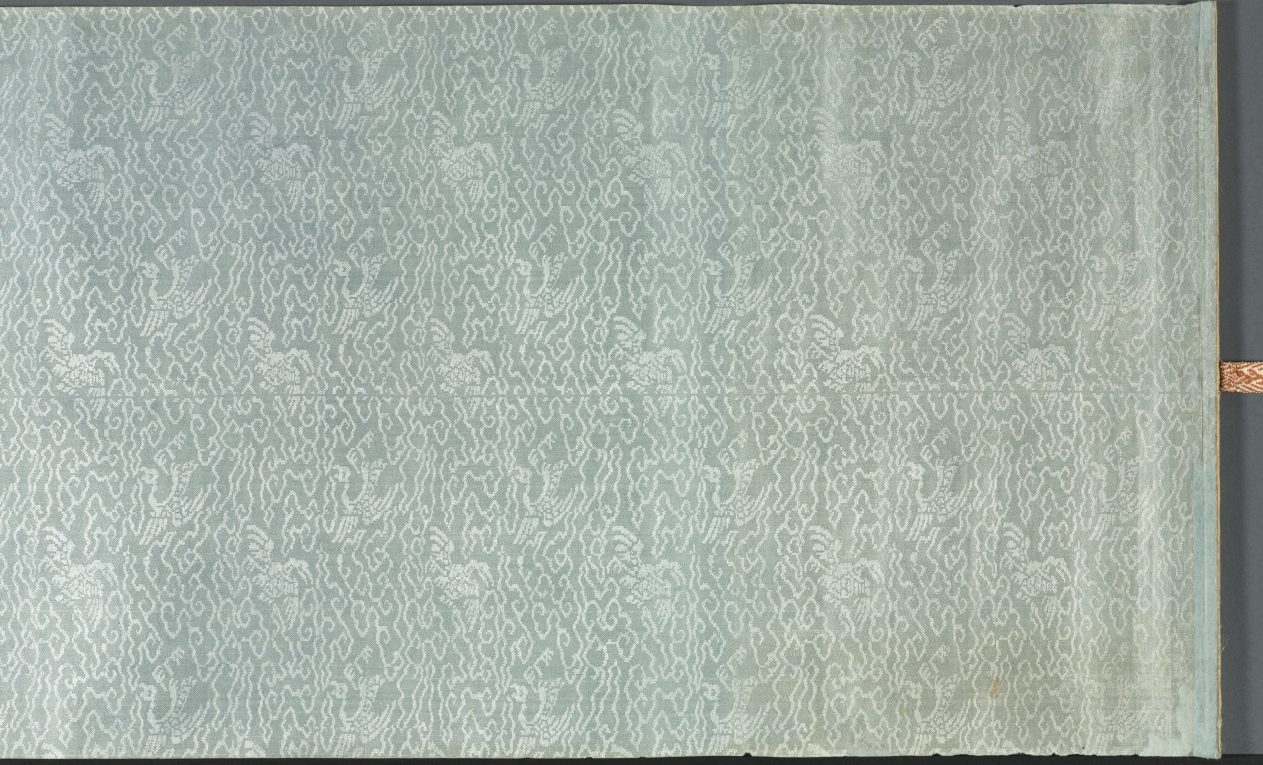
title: Buddha's Conversion of Five Bhiksu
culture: China, Yuan dynasty (1271–1368)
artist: Li Sheng (Chinese, active c. 1324–after 1375)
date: mid-1300s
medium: handscroll; ink on paper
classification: Painting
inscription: 紫篔生李升識 [印] 李氏子雲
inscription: 4 colophons and 12 additional seals: The "Heart" Sutra (Maha Prajnaparamita) text written by Wu Yuqing 吳餘慶 (active early 1400s); 2 seals of Xu Qianxue 徐乾學 (1631–1694); 3 colophons, one dated 1929 and two dated 1936, and 9 seals of Wu Hufan 吳湖帆 (1894–1968); 1 colophon, dated 1932, of Chen Dingshan; 1 seal unidentified.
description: This episode stems from the life of the historical Buddha, who, after his enlightenment, was initially hesitant about preaching his own doctrine. After much personal deliberation and prodding by deities, he finally relented. The first converts were the five guards who served him when he was still a prince. For Li Sheng, this is the pretext of the painting, which moves from the interaction of the bhiksu with the Buddha to a broader awareness of the vast surroundings of the scene.